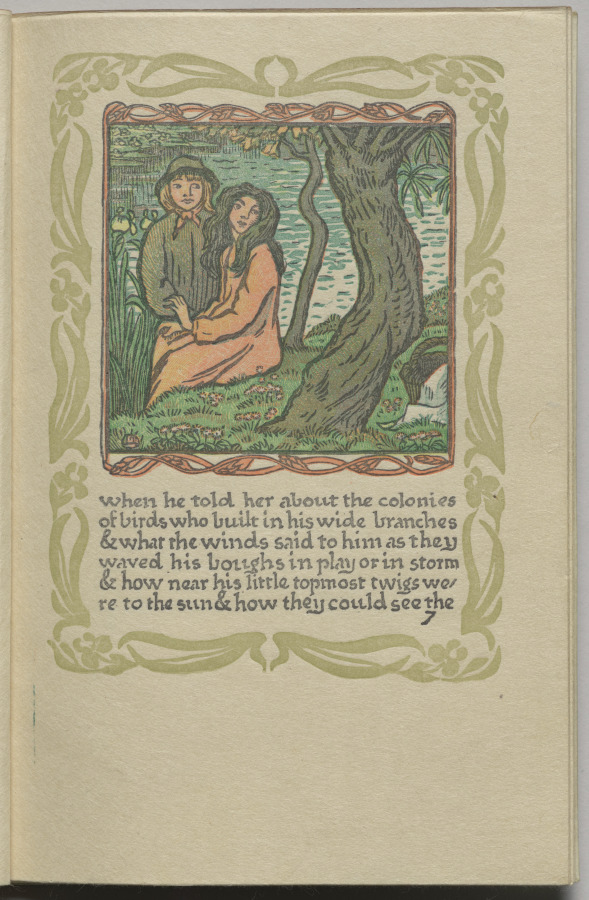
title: The Queen of the Fishes: Plate 7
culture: England, 19th century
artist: Lucien Pissarro (British, 1863–1944)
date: 1894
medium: color woodcut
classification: Bound Volume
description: Pissarro, son of the French Impressionist artist Camille Pissarro, moved to England in 1890. By 1894 he and his wife, Esther Bensusan Pissarro, had bought a printing press and established the Eragny Press. Influenced by William Morris, they were involved in every step of the production process: designing, cutting the woodblocks, setting type, and printing. The first book published by Ergany Press, The Queen of the Fishes, is based on an old fairy tale in which a peasant boy and girl escape the hardships of their lives by fantasizing that they have been turned into a giant oak and a splendid fish, respectively.